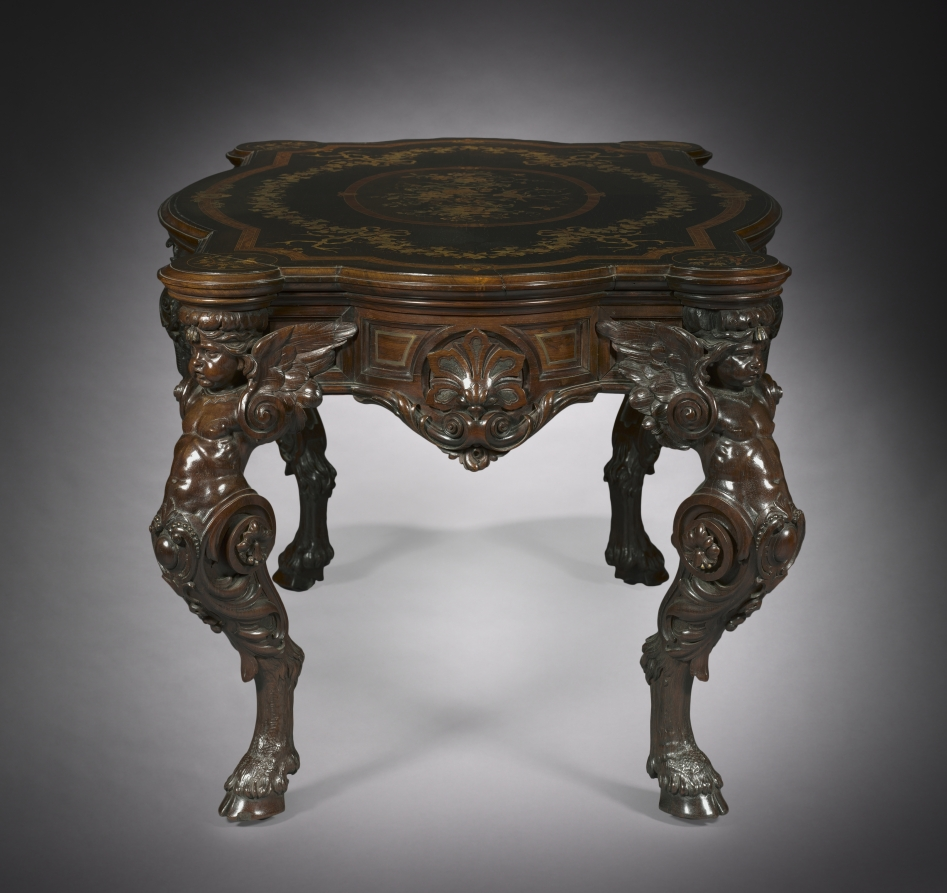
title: Center Table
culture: America, New York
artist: Gustave Herter Firm (American)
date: c.1860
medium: rosewood with marquetry of various woods, brass inlay, and gilding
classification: Furniture and woodwork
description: Gustave Herter was born in Germany and came to America about 1848. This table can be identified as his work because of its close resemblance to a table supplied by Herter about 1860 to the Victoria Mansion in Portland, Maine. The pictorial marquetry of the top may have been imported from France and incorporated into this table, probably made in New York.